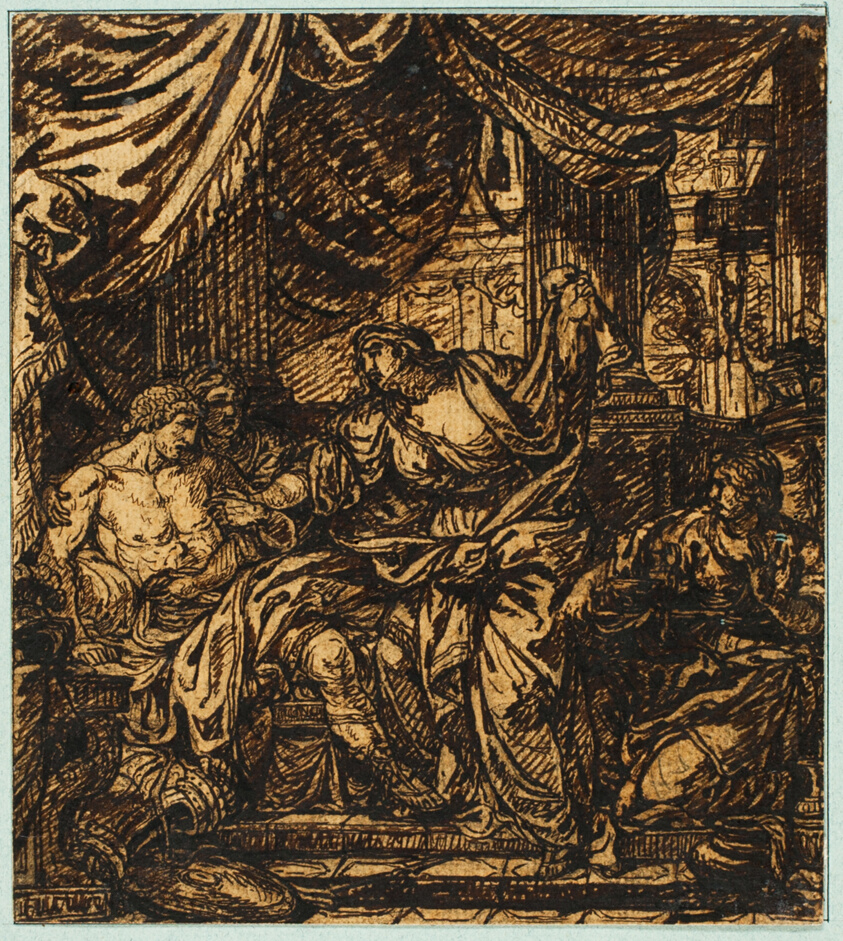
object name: Drawing and Watercolor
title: Antiochus I and Stratonice (recto), and Seated Woman (verso)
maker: Follower of Gabriel François Doyen; French, 1726-1806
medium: Pen and black and brown ink, over black chalk, on tan laid paper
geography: France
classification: pen and ink drawings; drawings (visual works); prints and drawing